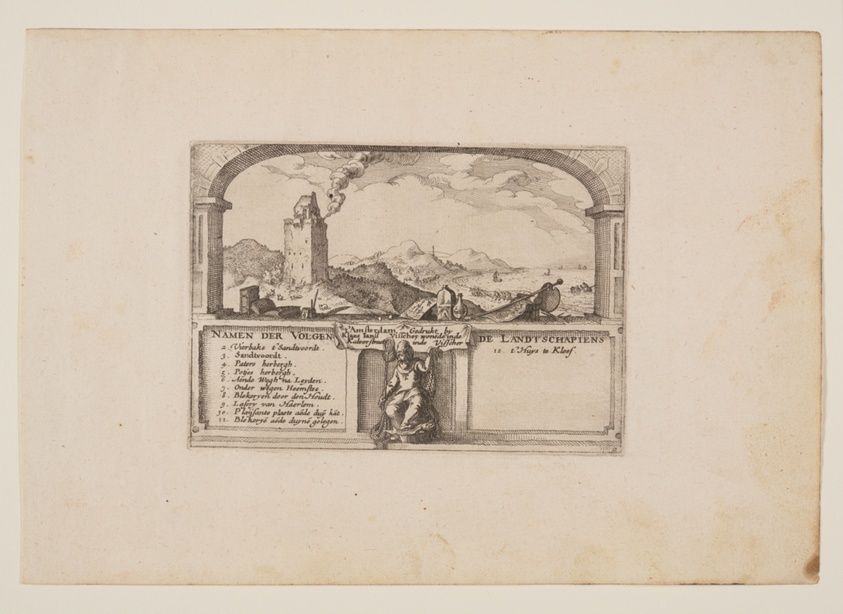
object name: Print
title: Beacon at Zandvoort, from Views in the Surroundings of Haarlem (Plaisante Plaetsen)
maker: Claes Jansz. Visscher (Netherlandish, c. 1550–c. 1612)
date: 1610/20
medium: Etching on ivory laid paper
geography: Netherlands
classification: print; paper; prints and drawing; etching